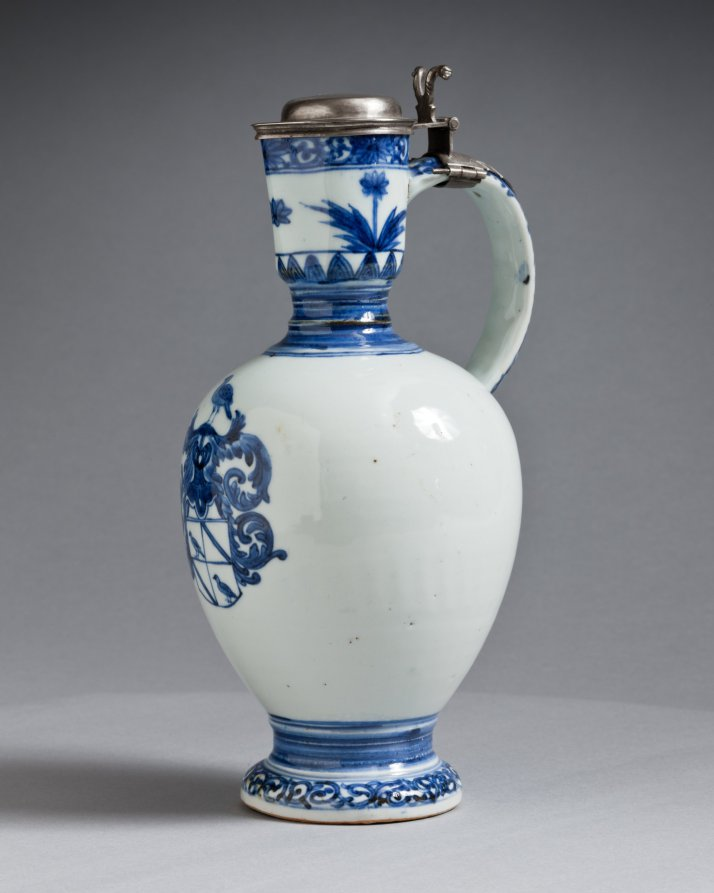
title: Jug with Silver Mounts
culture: Japan, Edo period (1615–1868)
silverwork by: Barent van Leeuwen (Dutch, 1637–1682)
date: c. 1662–76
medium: porcelain with underglaze blue decoration and silver mounts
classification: Ceramic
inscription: [on silver]: town mark for Amsterdam; lion rampant crowned (alloy mark for 0-934 silver); d (date letter for 1666), maker's mark of Barent van Leeuwen.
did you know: The coat of arms on this jug are those of the Valckenier family, active in the Dutch East India Company.